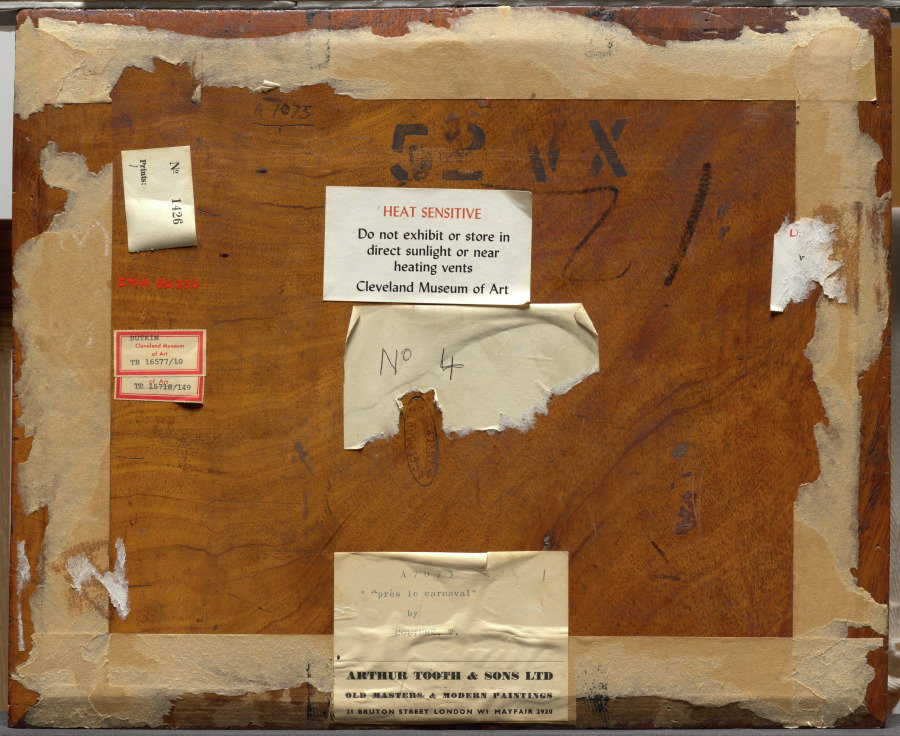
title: Pierrot in Criminal Court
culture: France, 19th century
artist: Thomas Couture (French, 1815–1879)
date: c. 1864–70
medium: oil on wood panel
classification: Painting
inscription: Signed left on the back of the bench: t.c.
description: In this painting, Couture used two famous masked characters, Pierrot and Harlequin, to satirize and critique the public and the judicial system of the 19th century. The pathetic Pierrot represents a lower-class fool on trial for stealing food from a restaurant. The stolen items are depicted lying on the courtroom floor as an indictment of his guilt. His accusers sit on the left, while Harlequin, his lawyer, argues theatrically for the defense. The artist's contempt for the legal profession and the court system is plain in the figures of the sleeping judges. A mid-19th-century observer may have sympathized with Pierrot, who for his own survival cunningly subverts authority in order to satisfy his needs.